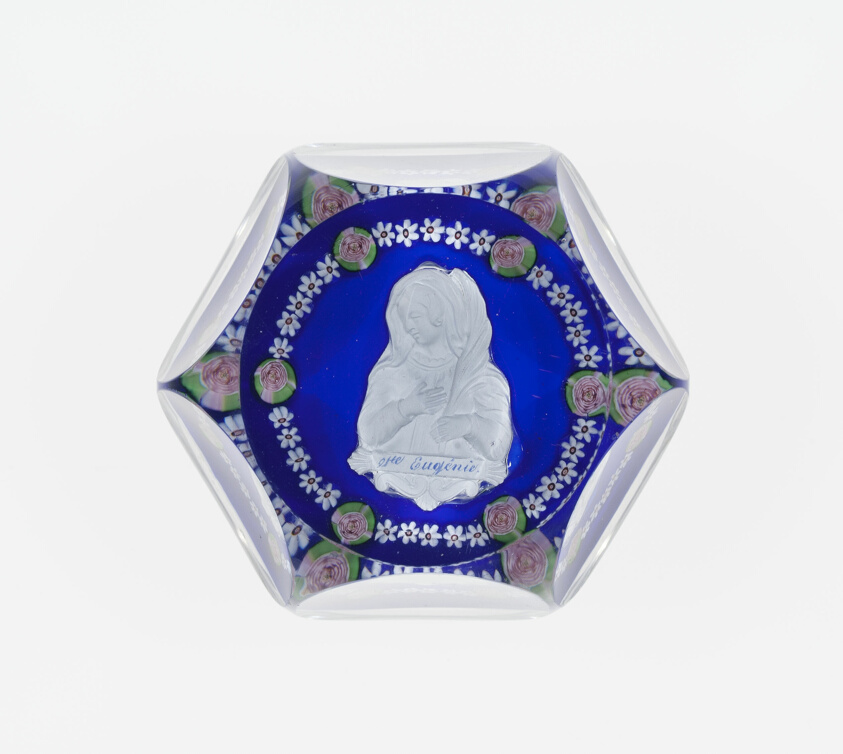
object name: Glass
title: Paperweight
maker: Clichy Glassworks (Cristalleries de Clichy); Clichy, France, 1837-1885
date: c. 1846–55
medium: Glass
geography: Clichy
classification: paperweight; sulphide (glass); european decorative arts; glass